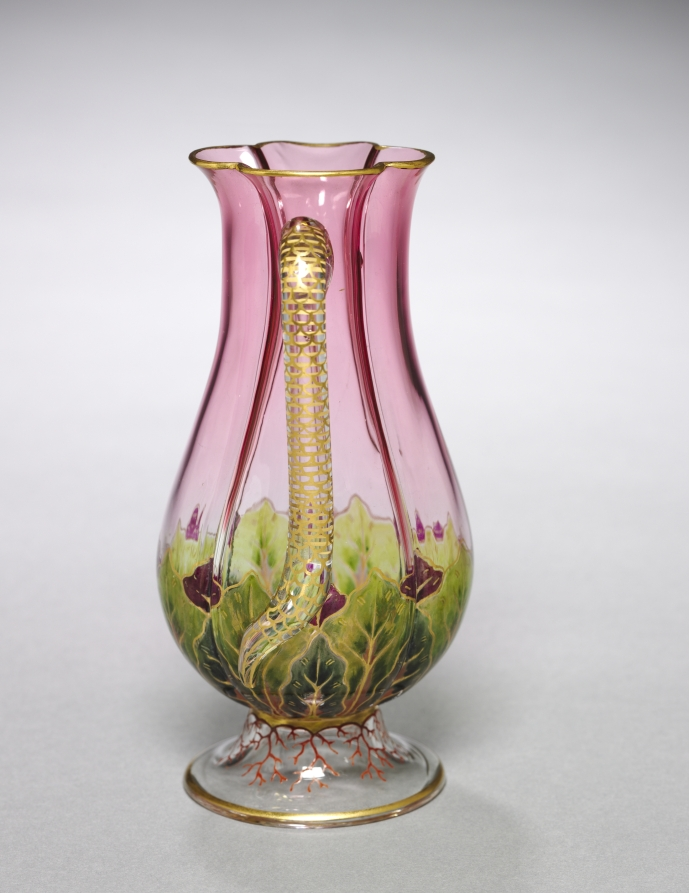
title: Pitcher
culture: Austria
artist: J. & L. Lobmeyr (Austrian, Vienna, est. 1823)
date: 1800s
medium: enameled and gilded glass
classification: Glass